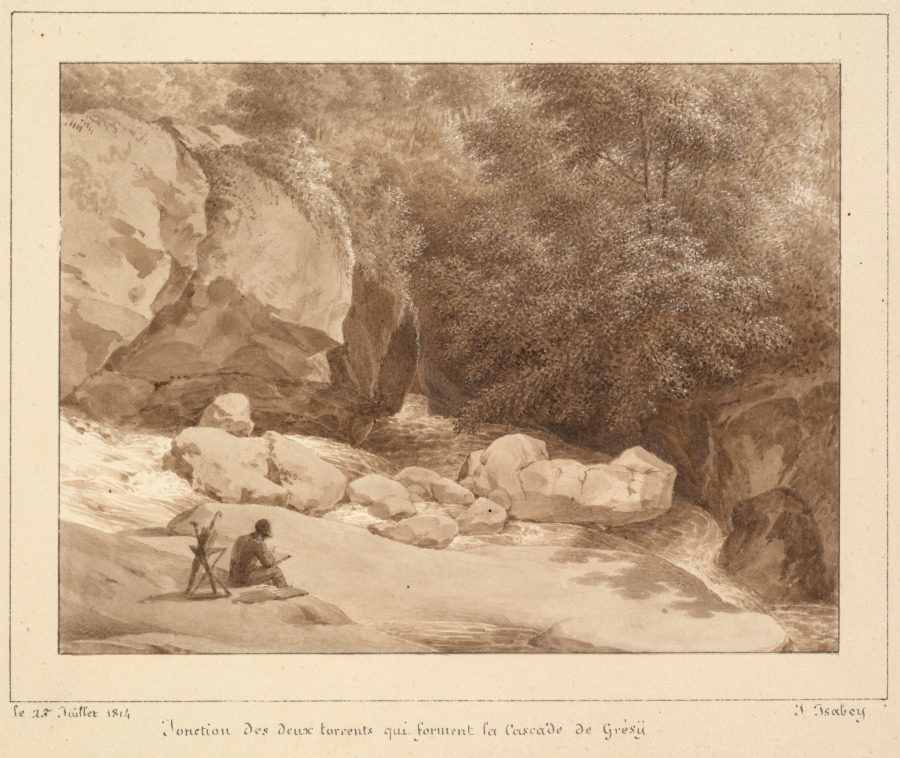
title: Jonction des deux torrents qui forment la Cascade de Grésy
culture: France, 19th century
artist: Jean-Baptiste Isabey (French, 1767–1855)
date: 1814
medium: brown wash with scraping; borders in black ink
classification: Drawing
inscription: Lower left corner, below image, in black ink: le 23 Juillet 1814 Lower right corner, below image, in black ink: J. Isabey Lower margin, in black ink: Jonction des deux torrent qui forment la Cascade de Grésÿ